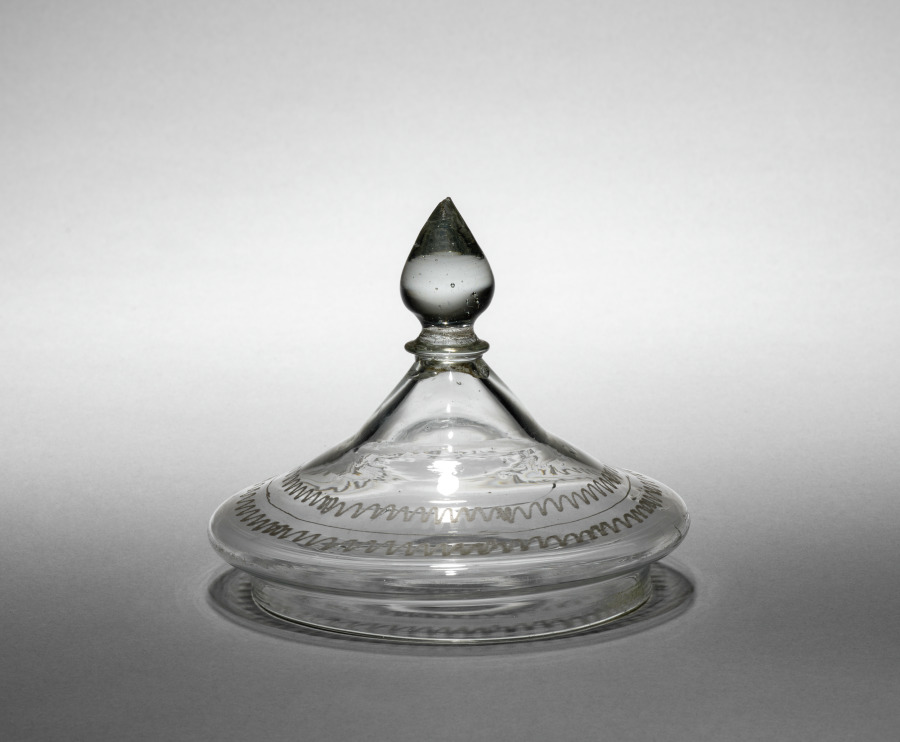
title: Flip Glass (lid)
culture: America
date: late 1700s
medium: glass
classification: Glass